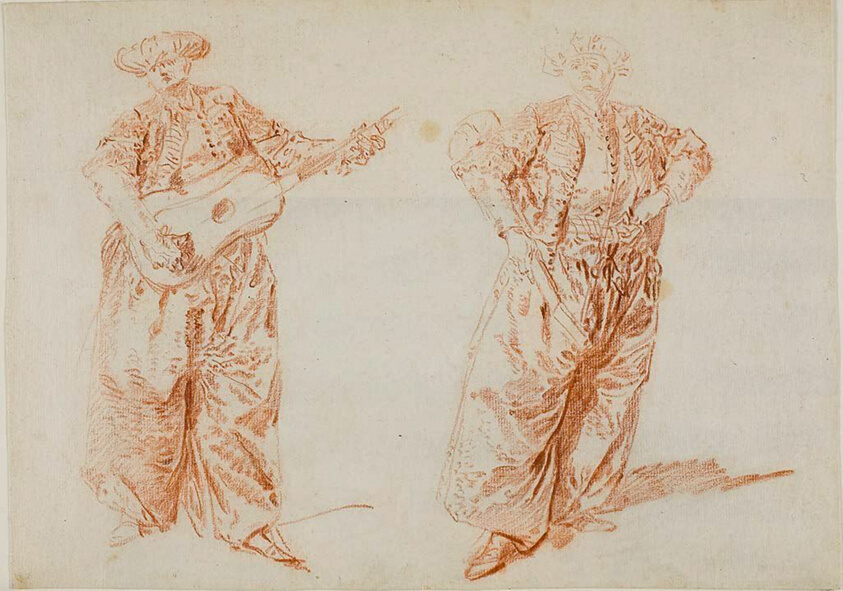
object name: Drawing and Watercolor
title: Two Studies of a Guitar Player in Turkish Costume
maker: Nicolas Lancret (French, 1690-1743)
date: c. 1728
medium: Red chalk on buff laid paper, laid down on cream laid paper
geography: France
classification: chalk; drawings (visual works); prints and drawing